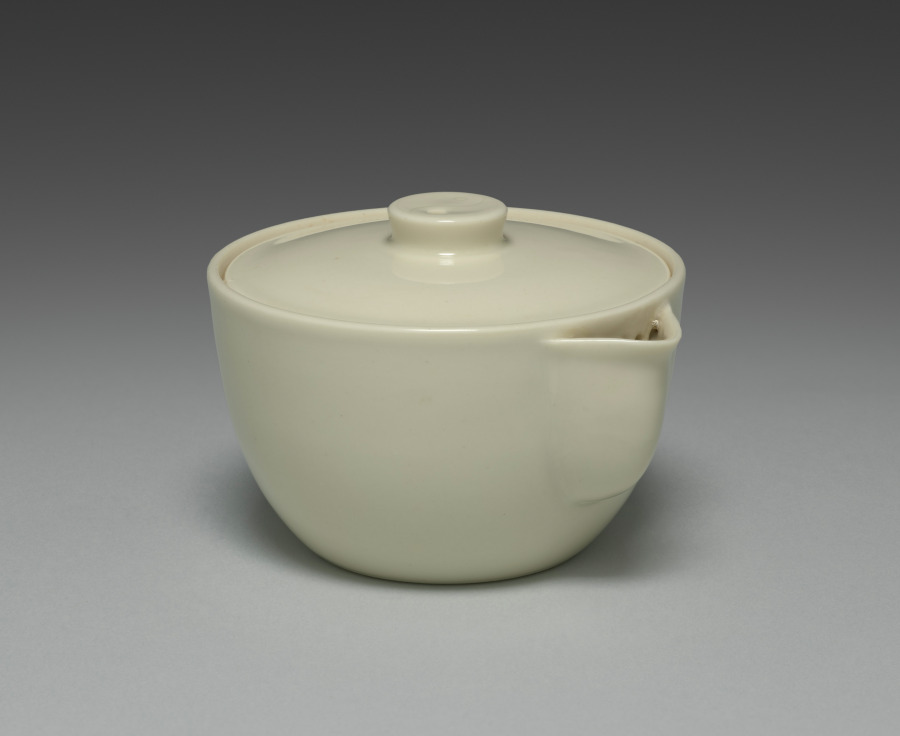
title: Hand-held Teapot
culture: Japan, Meiji period (1868–1912)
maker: Seifū Yohei III (Japanese, 1851–1914)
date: 1893–1914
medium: Porcelain with molded and carved design and cream glaze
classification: Ceramic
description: This teapot is of a variety used by advanced sencha practitioners. Called a hōhin, the pot is designed to be held directly by the fingers, with the body touching the upper part of the palm. This shape allows the host to manipulate the pot with a single hand and demonstrate dexterity. Direct contact between the ceramic body and the hand allows the host to closely gauge the temperature of the water within. There are differing grades of sencha, and for the finest one, gyokuro, the water temperature must be carefully regulated to achieve the proper flavor. This vessel is therefore efficacious for preparing this high-quality tea. The hōhin is also extremely portable, so it is well suited for impromptu gatherings. According to its box, this teapot is an example of taihakuji. “Great-white porcelain” was an important early invention Yohei III devised in 1972. It involved the combination of a distinctive translucent, creamy glaze over an ivory-colored clay body.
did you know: This pot’s restrained design includes on the lid’s handle a yin-yang motif, symbolizing the ideal balance between the forces of the universe.